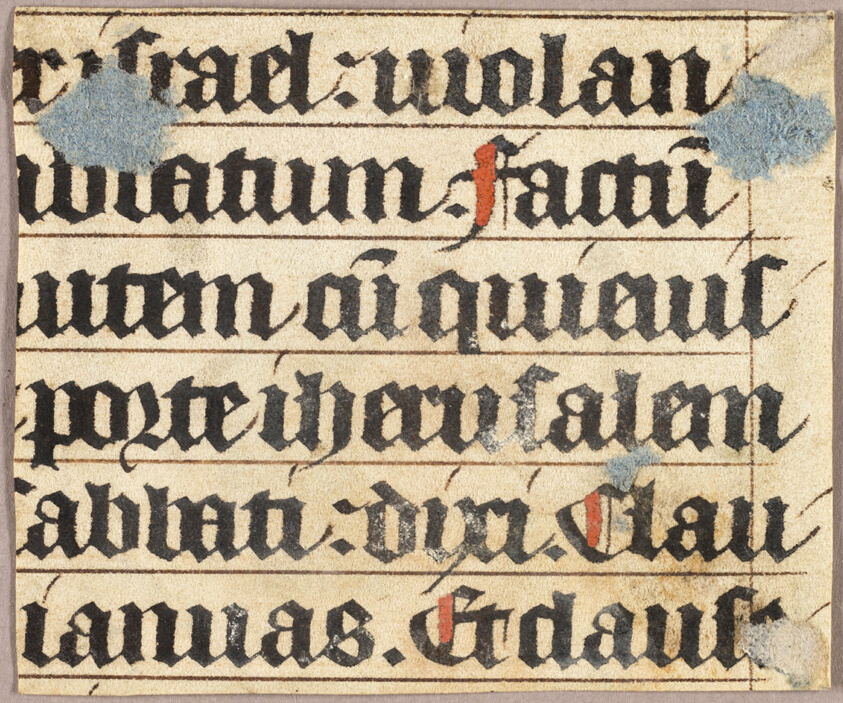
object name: Drawing and Watercolor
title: Nehemiah before King Artaxerxes, initial ‘C’ from a Bible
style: medieval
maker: Masters of Zweder van Culemborg; Northern Netherlandish (Utrecht), about 1415-1440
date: about 1430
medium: Opaque watercolor, gold leaf, mordant gilding, and pen and black ink, with touches of pen and brown ink (recto), and pen and black ink, with touches of red opaque watercolor and pen and brown ink (verso), on parchment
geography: Netherlands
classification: watercolor; manuscript; prints and drawing